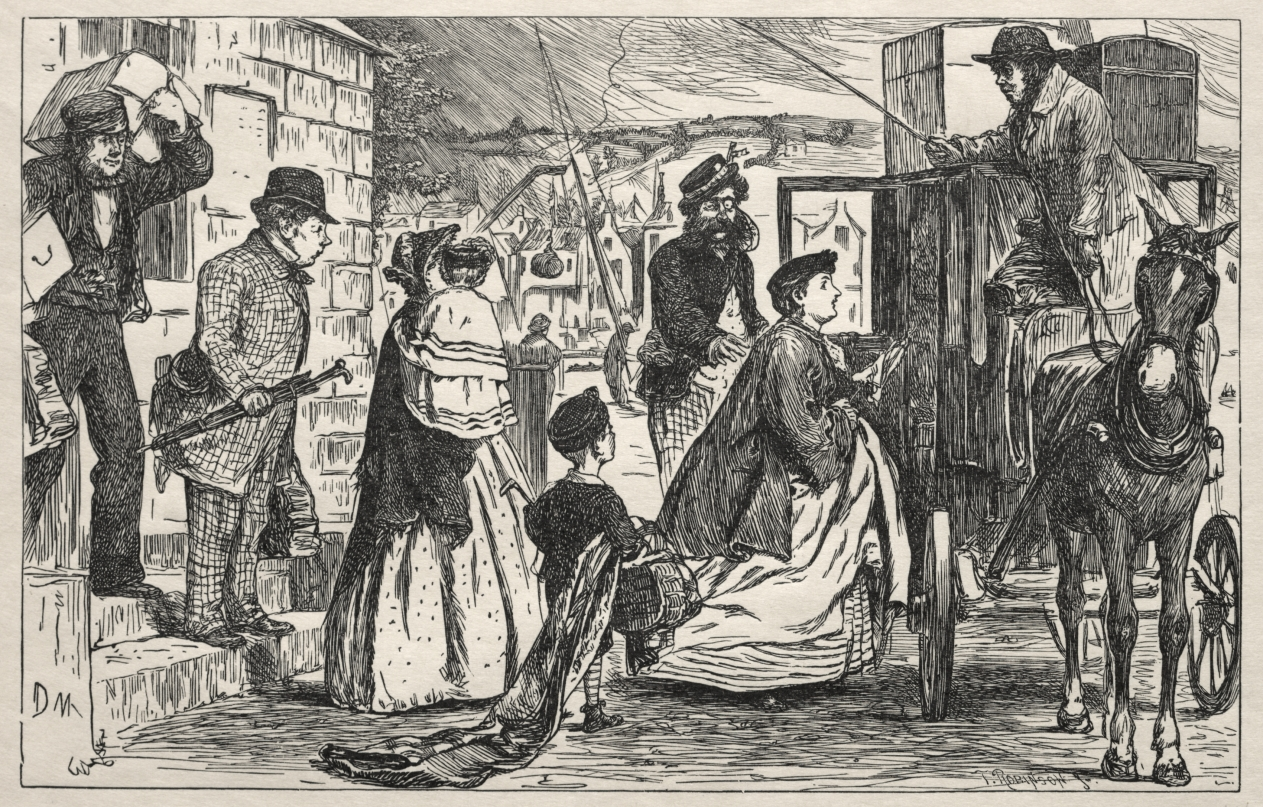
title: Our Brilliant Failure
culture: England, 19th century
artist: George Louis Palmella Busson Du Maurier (British, 1834–1896)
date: 1865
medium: wood engraving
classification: Print